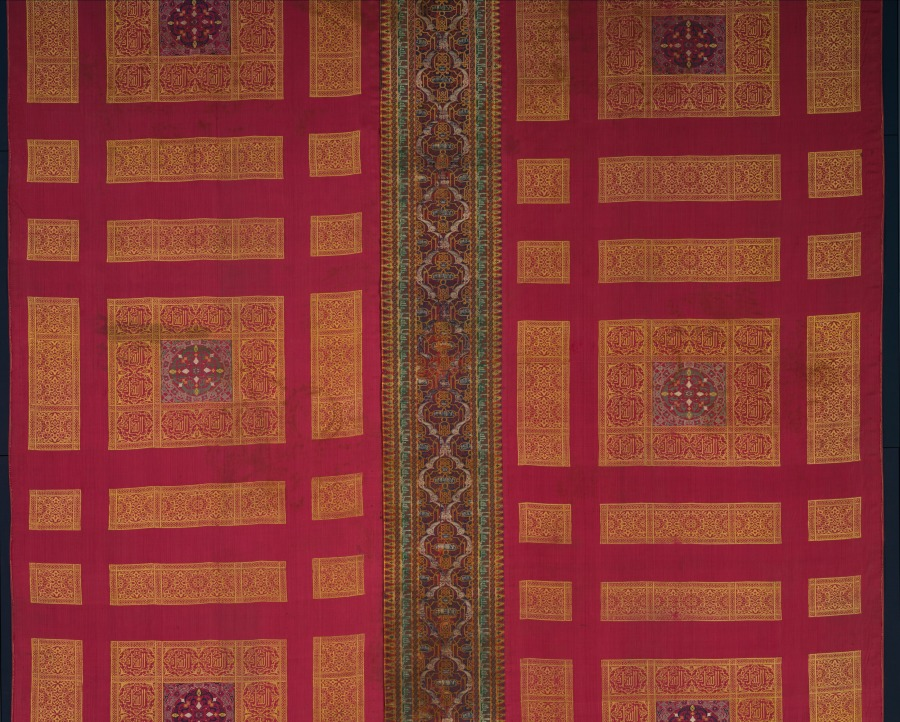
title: Silk curtain from the Alhambra palace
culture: Spain, Granada, Nasrid period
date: 1300s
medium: lampas and taqueté: silk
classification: Textile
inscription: the bold knotted Kufic inscription in the top and bottom borders of the side panels repeats the Arabic word "felicity." Within the arches forming a frieze in the top border is a Kufic inscription "good fortune" and a Naskhi inscription repeating trhe motto of the Nasrid dynasty, "There is no conqueror but God." In the borders of the three large ornamental rectangles on each side panel is the Naskhi inscription "Dominion belongs to God alone." On the central panel the inscriptions in the borders repeat the phrase, "Majestry is God's," while the Nasrid motto, "There is no conqueror but God" and, above, "Blessing," are inscribed in the arabesque ogives.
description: This is one of two of the largest, most complete, and most ornate curtains to survive from the 1300s when it presumably hung in the royal Alhambra Palace in Granada, the last Muslim stronghold in Spain. Its style, artistic vocabulary, and harmonious proportions reflect the magnificent wall decoration in the Alhambra. The motto of the ruling Nasrid dynasty, "There is no conqueror but God," is inscribed in the end borders and central panel. The inscribed striped silk forming the central panel is more worn, suggesting that it was recycled, most likely during the 1300s.